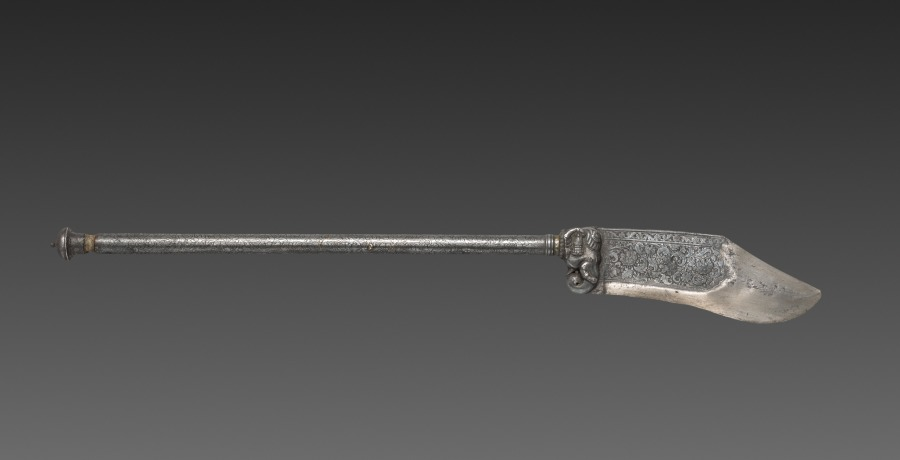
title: Battle Axe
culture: India, Sind, Kach tribe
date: c. 1800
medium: steel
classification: Arms and Armor